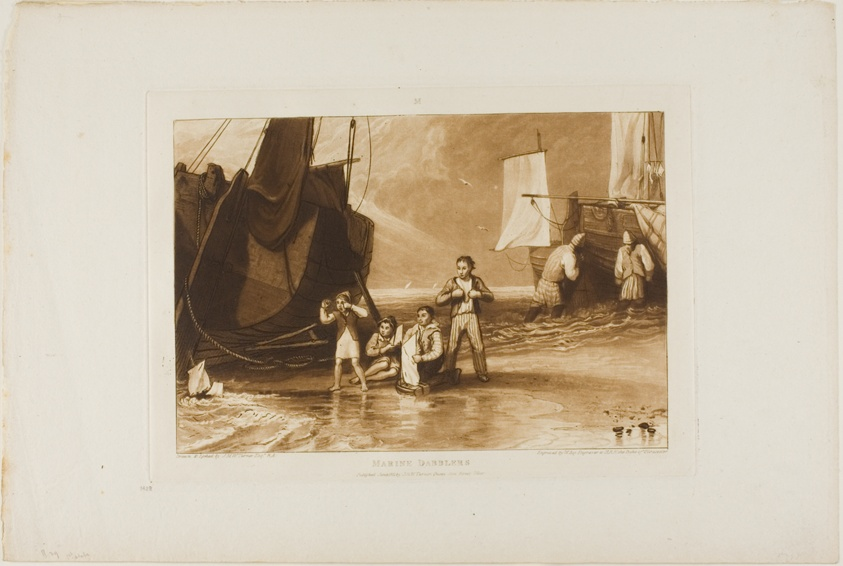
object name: Print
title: Marine Dabblers, plate 29 from Liber Studiorum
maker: Joseph Mallord William Turner (English, 1775-1851); Engraved by William Say (English, 1768-1834)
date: published June 1811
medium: Etching and engraving in brown on ivory wove paper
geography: England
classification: etching; print; prints and drawing